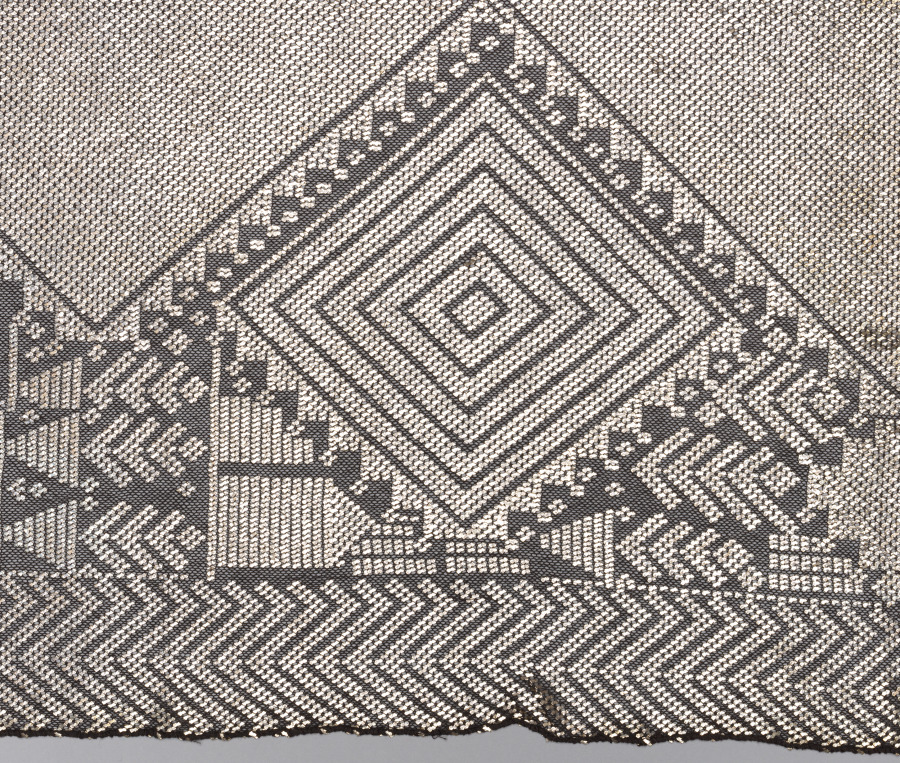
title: Scarf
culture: Africa, North Africa, Egypt, Assiut, Egyptian maker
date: early 1900s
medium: Probably cotton and silver-plated copper foil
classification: Garment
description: Egyptians may have innovated tulle-bi-telli (“net with metal,” also called assiut) after the French introduced machine-made netted fabric (tulle) in the late 1800s. It drew from telli, an earlier metal embroidery technique. Diamond and rectangle designs formed by knotting flattened silver wire into black tulle indicate this scarf’s early age in the genre. Urban Egyptian singers and dancers performed in heavy, shimmering tulle-bi-telli costumes during the late 1800s through the mid-1900s. Elite Egyptian city dwellers also wore it. Similar ones were sold at the 1893 World’s Columbian Exposition in Chicago and to tourists in Egypt, a possible origin for this example. In the US, tulle-bi-telli scarves were made into home decor and 1920s flapper-style clothing.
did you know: There is so much metal in this shawl that it weighs nearly 4.5 pounds.